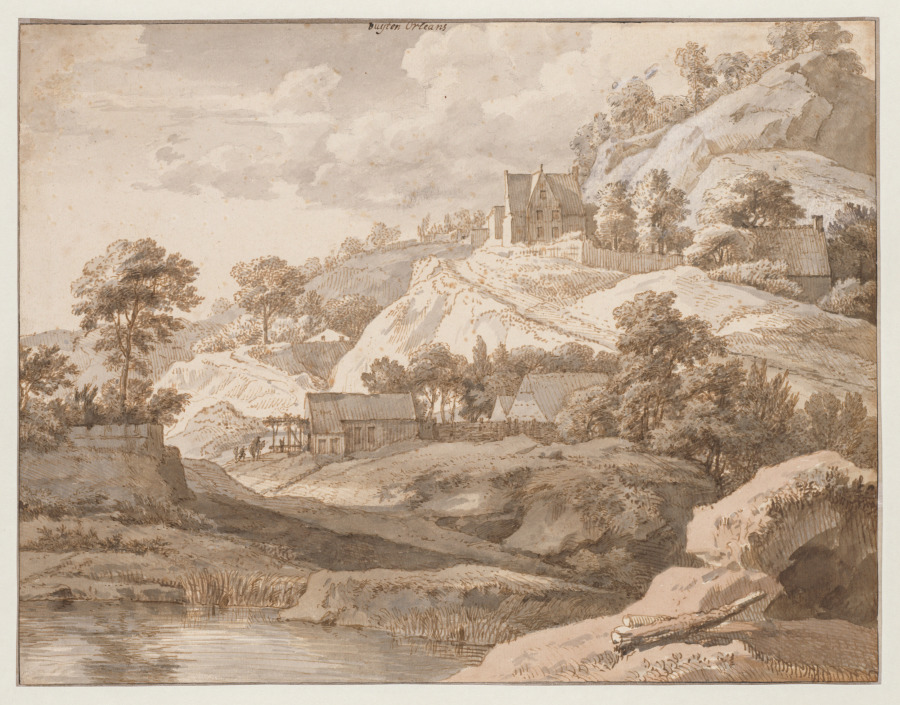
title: View near Orleans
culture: Netherlands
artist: Isaac de Moucheron (Dutch, 1667–1744)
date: c. 1695–97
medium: Pen and brown ink, grey, brown, pink-brown, and pale grey mixed with white washes, with traces of graphite underdrawing on laid paper; framing lines in pen and brown ink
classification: Drawing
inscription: Upper center, in brown ink: Buyten Orleans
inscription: verso, in brown ink, lower left: N. 7. (numeral of Johan Goll van Franckenstein senior (Lugt. 2987)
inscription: verso, in graphite: 7. and d Moucheron? (crossed out) and 145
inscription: Collector’s stamp verso, “PG”? in red ink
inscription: watermark: fleur de lys (Hinterding B-a_NGV-23-4)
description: The Dutch artist Isaac de Moucheron’s view of a rural hillside is inscribed in Dutch “Buyten Orleans” (outside Orleans), indicating that he made the drawing while passing through France on a journey from the Netherlands to Italy. De Moucheron likely captured this scene with graphite and ink while on-site and then finished it later with gray, brown, and pink washes. Many Dutch artists took Italian sojourns to sketch the landscape, antique sculpture, and architecture.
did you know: The artist captured this scene in France during a long journey from the Netherlands to Italy.